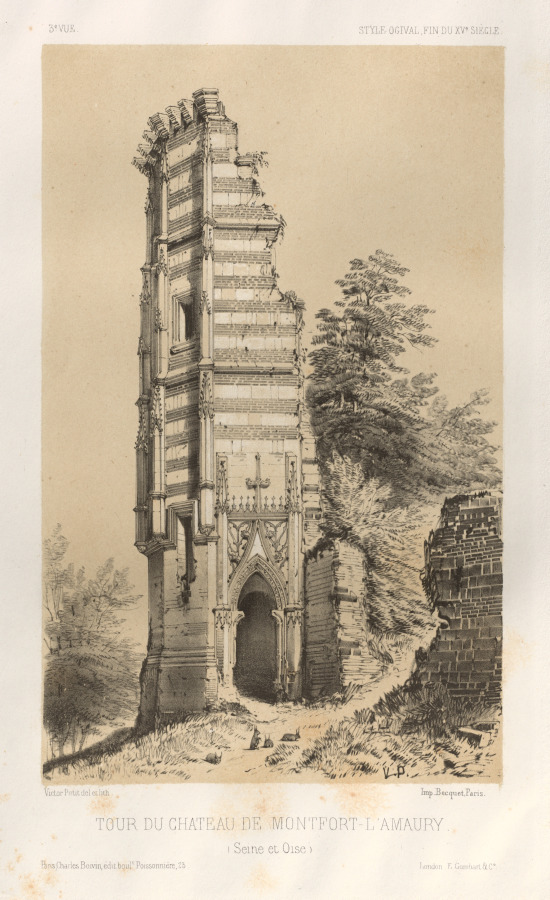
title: Architecture Pittoresque ou Monuments des xveme. Et xvieme. Siecles: Chateaux De France des XV et XVI Siecles: Pl.3, Tour du chateau de Montfort-l'Amaury (Seine-et-Oise)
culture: France, 19th century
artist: Victor Petit (French, 1817–1874)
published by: Charles Boivin (publisher and editor); Lith de Godard a Paris (printer)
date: 1860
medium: lithograph with tint stone, from portfolio of 100 lithographs with tint stone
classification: Print